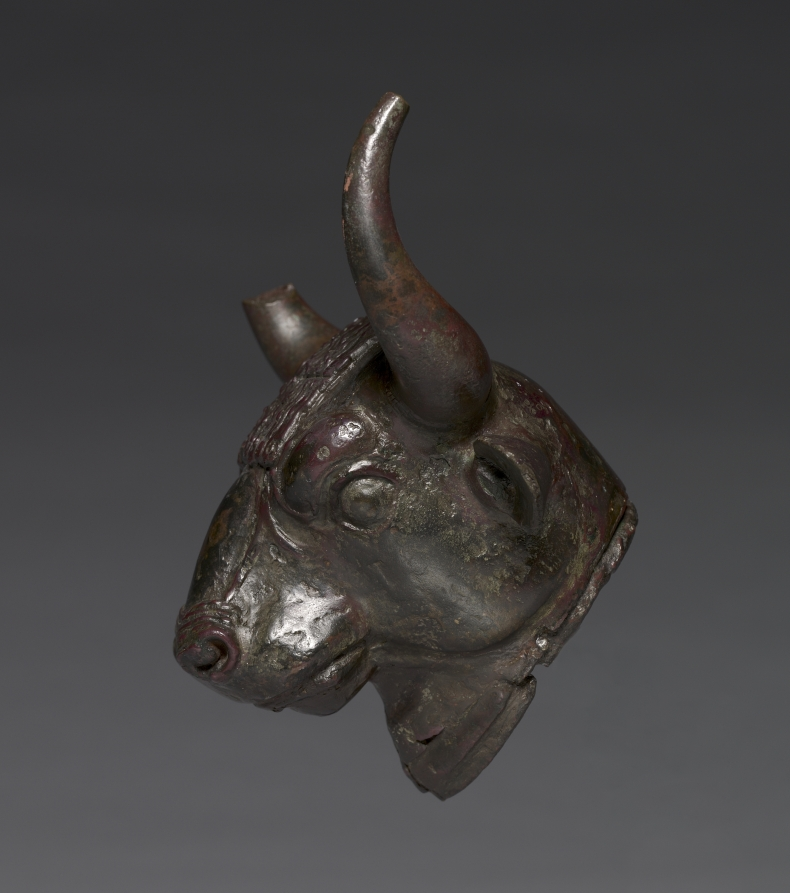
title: Bull Head Attachment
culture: Urartian, northwest Iran, possibly Gusçi, Lake Urmia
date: c. 700–600 BCE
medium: bronze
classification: Sculpture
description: The kingdom of Urartu was contemporary with the Assyrian civilization. The Urartians produced elaborate bronze objects and probably passed on many of their metalwork traditions to the Achaemenian Persians. This bull head was probably one of four placed at cardinal points around the rim of a huge Urartian bronze cauldron.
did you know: Bulls were symbols of power and fertility in many ancient cultures. This bronze bull's head was made in the kingdom of Urartu, which was located in what is Iran today, and was likely attached to the rim of a giant cauldron or cooking pot.